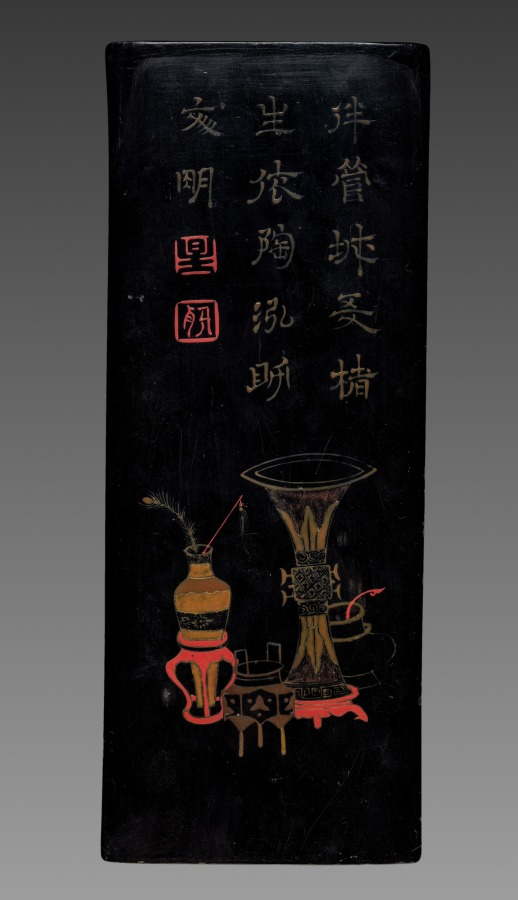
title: Ink Cake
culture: China, Qing dynasty (1644-1911)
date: 19th Century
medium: ink cake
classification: Miscellaneous